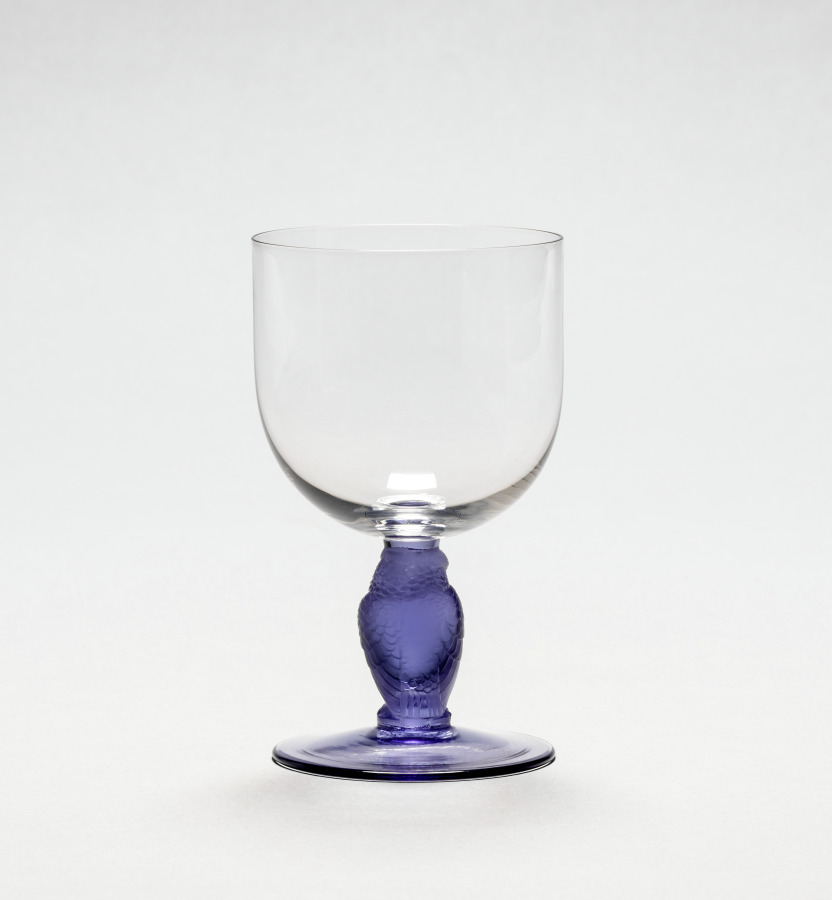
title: Raptor Goblet (Verre rapace)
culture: France, 20th century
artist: René Lalique (French, 1860–1945)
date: c. 1929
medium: Cast and blown glass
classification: Glass